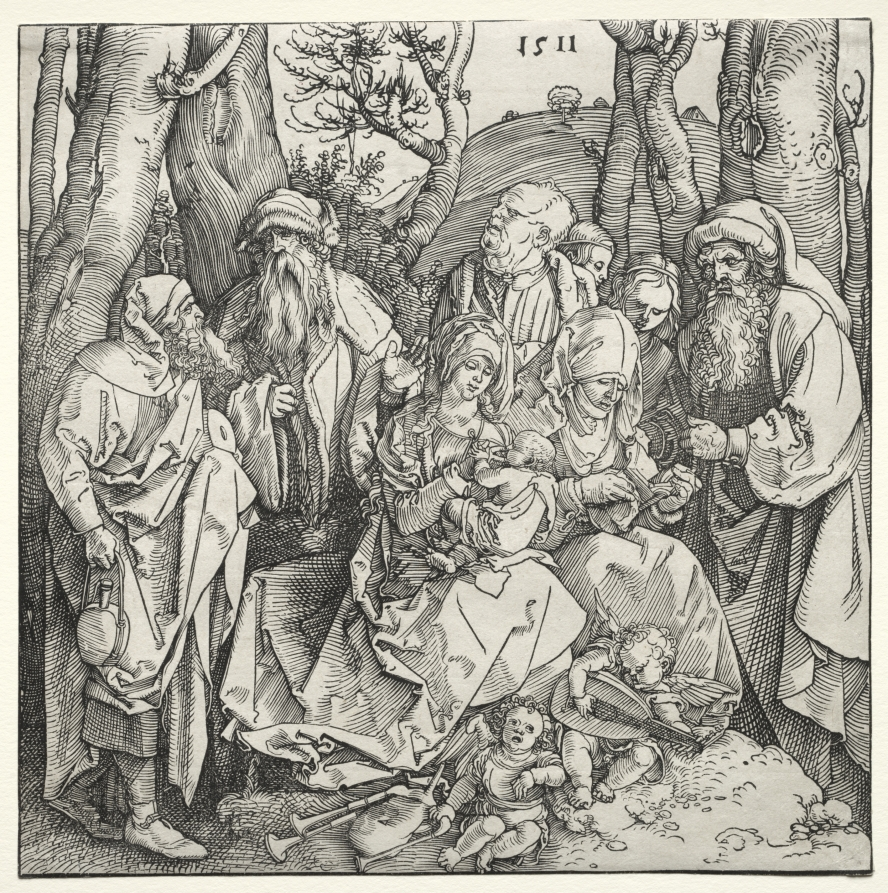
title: The Holy Family with Two Musician Angels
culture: Germany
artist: Albrecht Dürer (German, 1471–1528)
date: 1511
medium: woodcut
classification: Print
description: In a whimsical detail, Dürer included two cherubs seated at the feet of the Virgin who attempt to play a lute and a bagpipe, heralding the celebration of the new family.